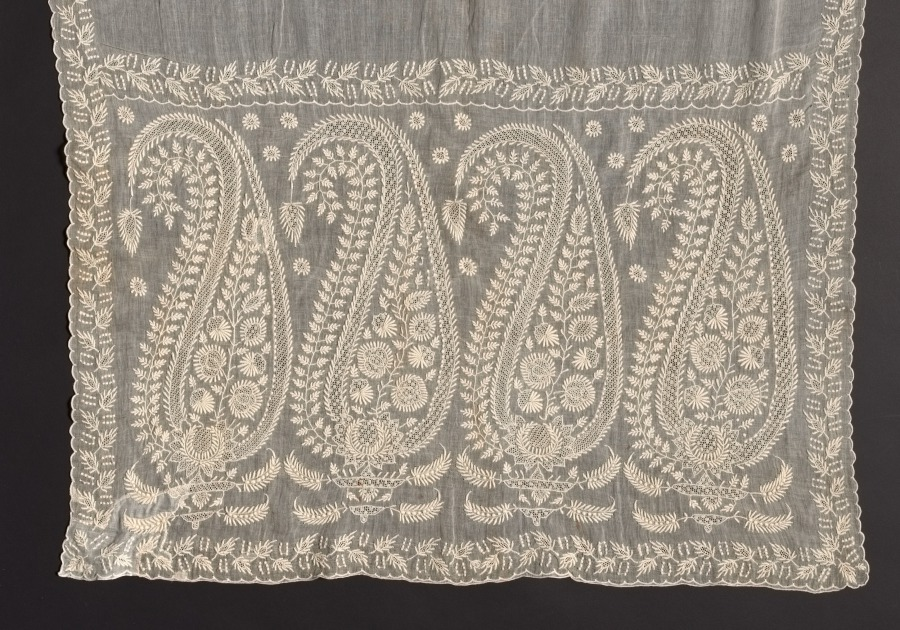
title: Embroidered Scarf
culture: Madeira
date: 1800–1820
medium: Plain weave cotton (est.): embroidered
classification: Embroidery